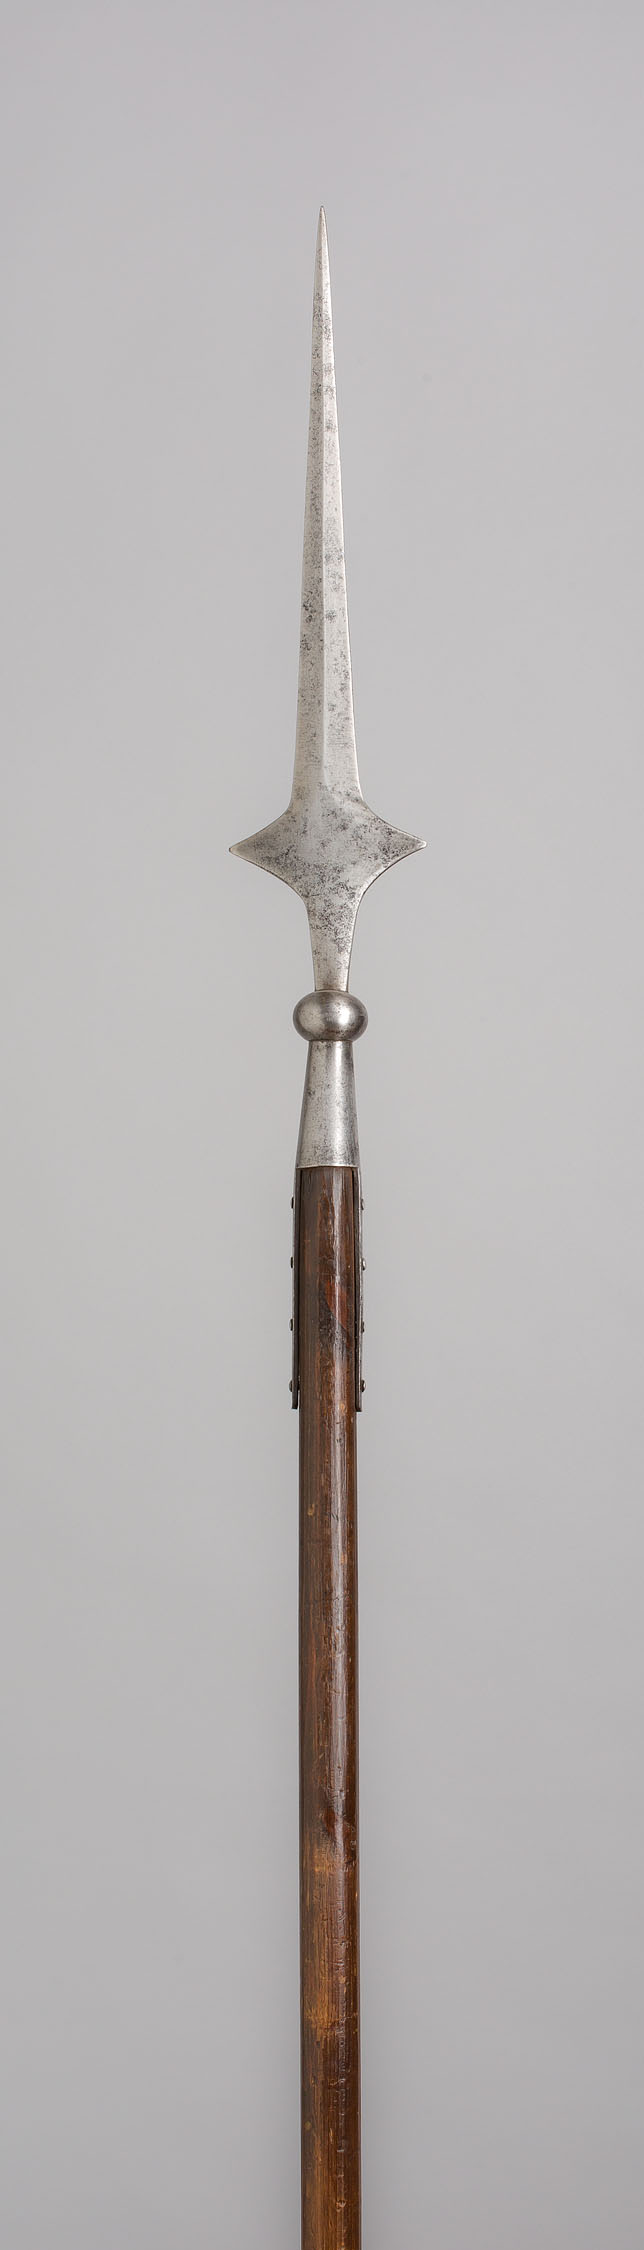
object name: Arms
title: "Eared" Spear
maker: German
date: 1500/1600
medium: Steel and wood (pine)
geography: Germany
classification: edged weapon-staff; arms; arms and armor